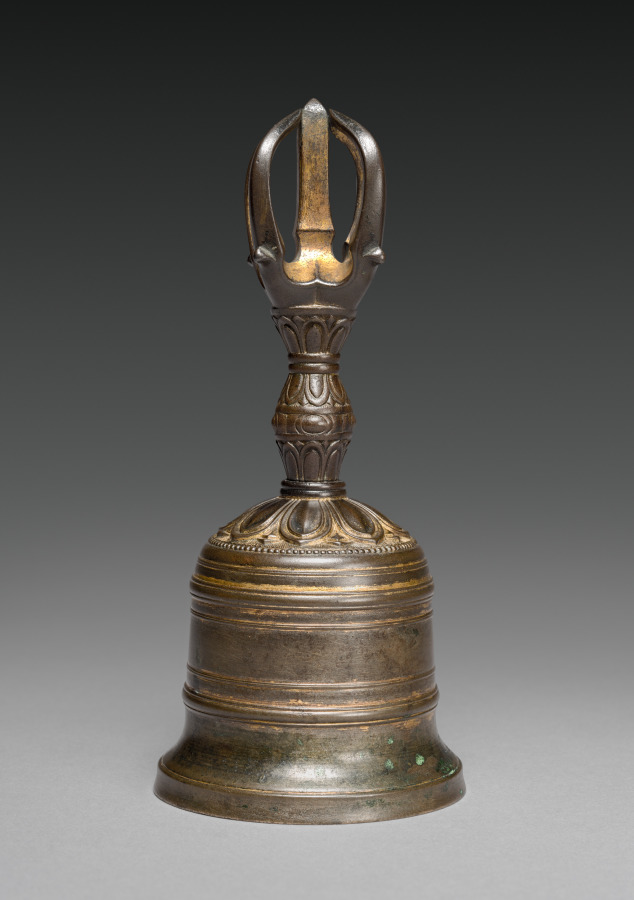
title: Five-pronged Vajra Bell (Gokorei)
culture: Japan, Kamakura period (1185–1333)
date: early 1300s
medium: gilt bronze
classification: Metalwork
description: The five prongs of this bell symbolize the Buddhist “Five Perfections”—generosity, morality, patience, perseverance, and concentration. The mouth of the bell symbolizes the “Sixth Perfection” of wisdom. The bell was used in Japanese Esoteric Buddhist rituals along with vajra pestles, or kongōsho.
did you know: Vajras are symbolic weapons, representing the properties of a diamond (indestructibility) and a thunderbolt (irresistible force), still used in Buddhist ceremonies today.